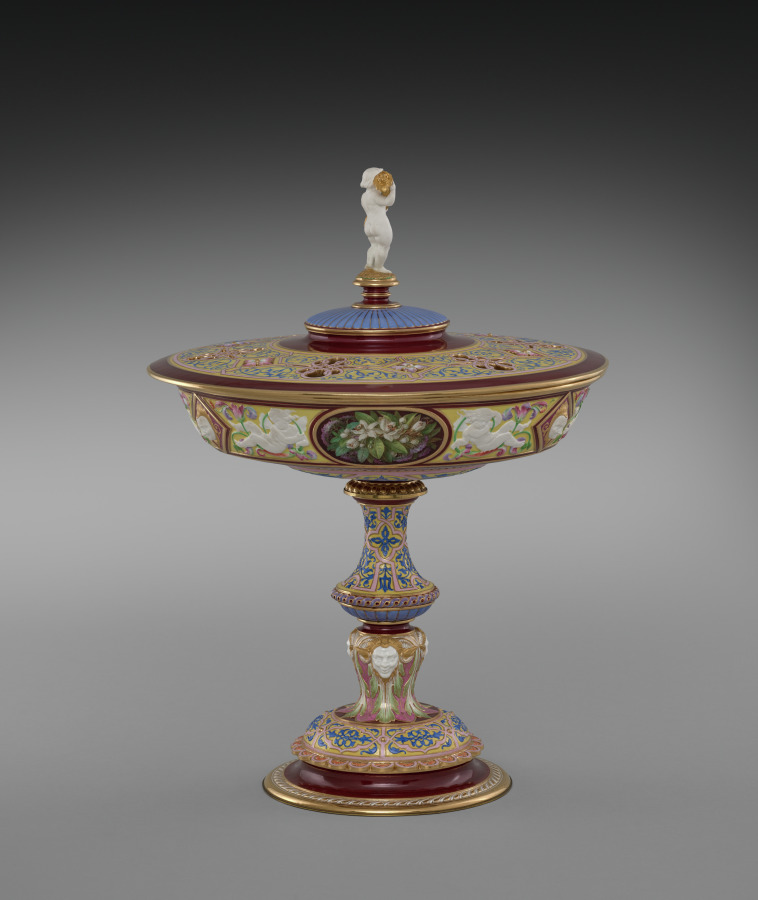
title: Standing Cup and Cover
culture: France, Sèvres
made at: Sèvres Porcelain Factory (French, est. 1756)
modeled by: Hyacinthe-Jean Regnier (French, 1803–1870)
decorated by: Francois-Hubert Barbin (French, 1786-)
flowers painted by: Jacques-Nicolas Sinsson (French)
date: 1844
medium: porcelain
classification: Ceramic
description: The official French porcelain factory at Sèvres has always been one of Europe's most important ceramic manufacturers, famous for its decorative pieces as well as more utilitarian wares. This vase in the Renaissance style, its design inspired by 16th-century French examples, is clearly in the tradition of elaborately conceived and decorated pieces intended for use by the French court or as presentation pieces by its monarchs. The latter was the fate of this Covered Cup, acquired in 1846 by Queen Marie-Amélie d'Orleans, the wife of Louis-Philippe, king during the July Monarchy (1830-48). Soon thereafter the vase was presented to a now unknown person. It is one of four pieces of this design made at the Sèvres factory, and the only one known today to have survived.